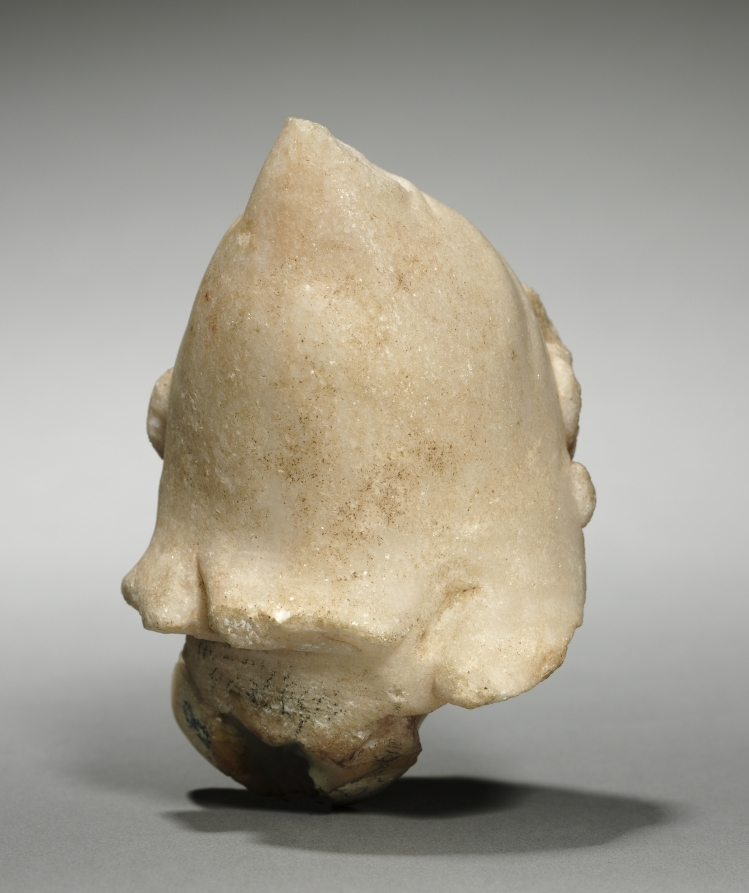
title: Head of a Foreign Warrior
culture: Greece, Alexandria or the Levant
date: 300–200 BCE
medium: marble with traces of paint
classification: Sculpture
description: This miniature head depicts a man with wild curls that still retain their original red pigment. He is immediately revealed as a non-Greek by his carved mustache, associated with Celtic tribes, and cone-shaped hat called a Phrygian cap, associated with eastern peoples such as the Persians. During the Hellenistic period, various non-Greek peoples served as mercenaries or fought against the Greek kingdoms, and these foreign warriors were depicted extensively in art.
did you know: There is a small notch below the cap's crest that likely held an attachment, now lost.